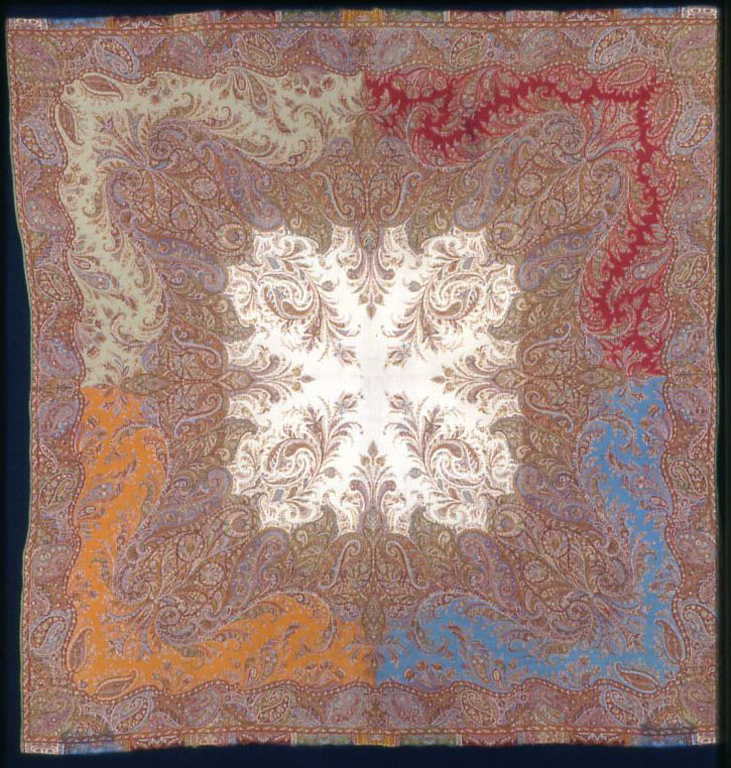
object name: Textile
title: Square Shawl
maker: France, England or Austria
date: c. 1850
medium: Silk, wool, and cotton, warp threads dyed in multiple colors prior to weaving; center of 2:2 'S' twill weave; patterned areas of warp-float faced 3:1 'S' twill weave with supplementary patterning wefts bound in weft-float faced 1:3 'S' twill interlacings; main warp fringe; woven on loom with Jacquard attachment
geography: France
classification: textile; weaving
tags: fashion